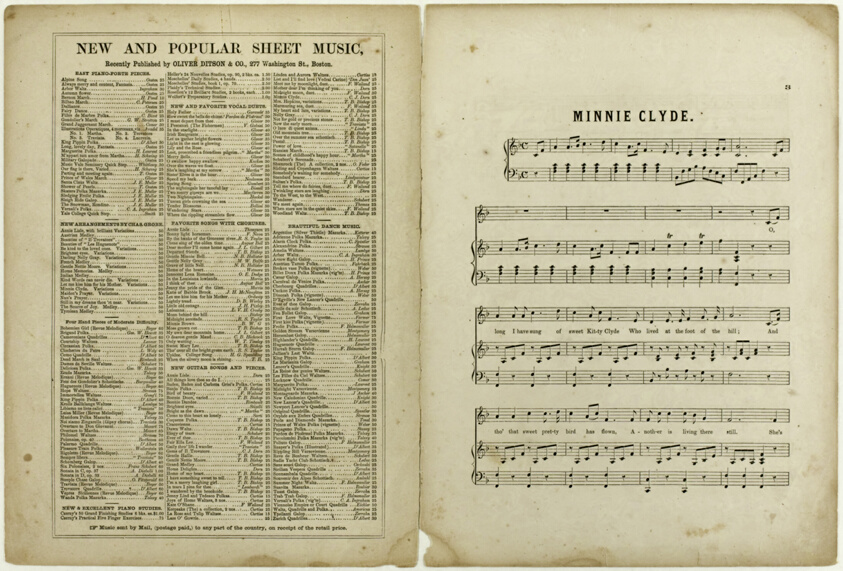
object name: Print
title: Minnie Clyde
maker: Winslow Homer (American, 1836-1910); published by Oliver Ditson (American, 1811-1888)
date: 1857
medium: Sheet music on cream wove paper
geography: United States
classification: print; prints and drawing